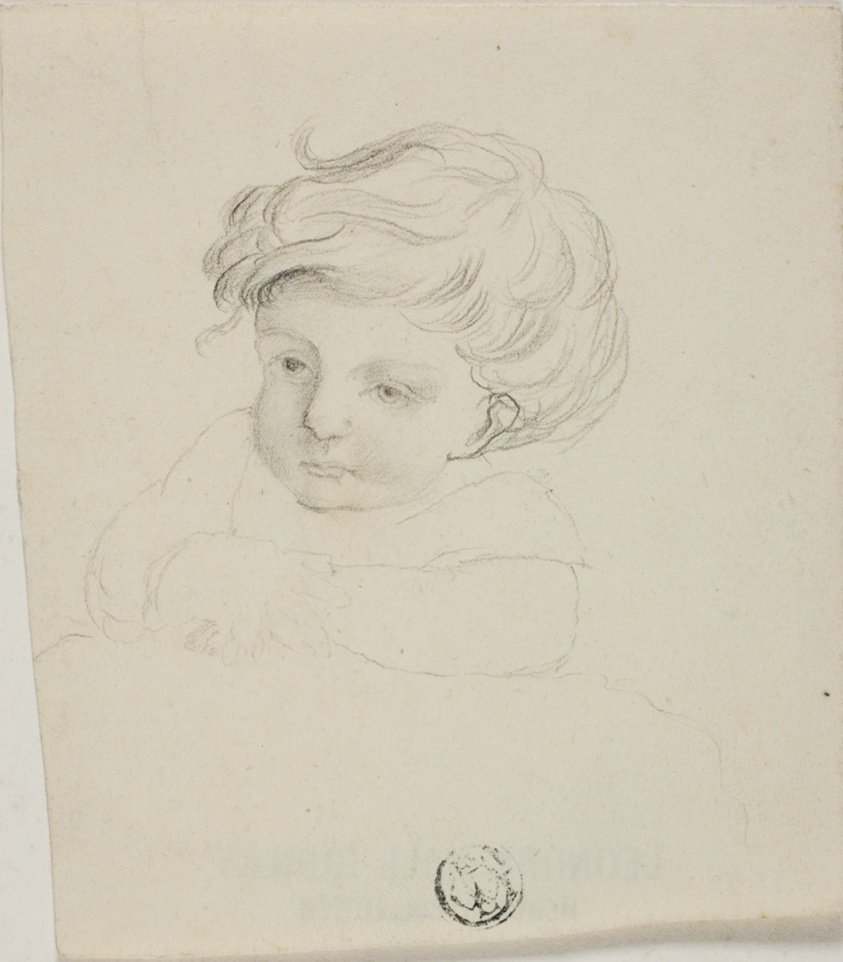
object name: Drawing and Watercolor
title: Bust of Child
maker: Unknown Artist; French or British, 1800-1899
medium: Graphite on ivory wove paper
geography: France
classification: graphite; drawings (visual works); prints and drawing